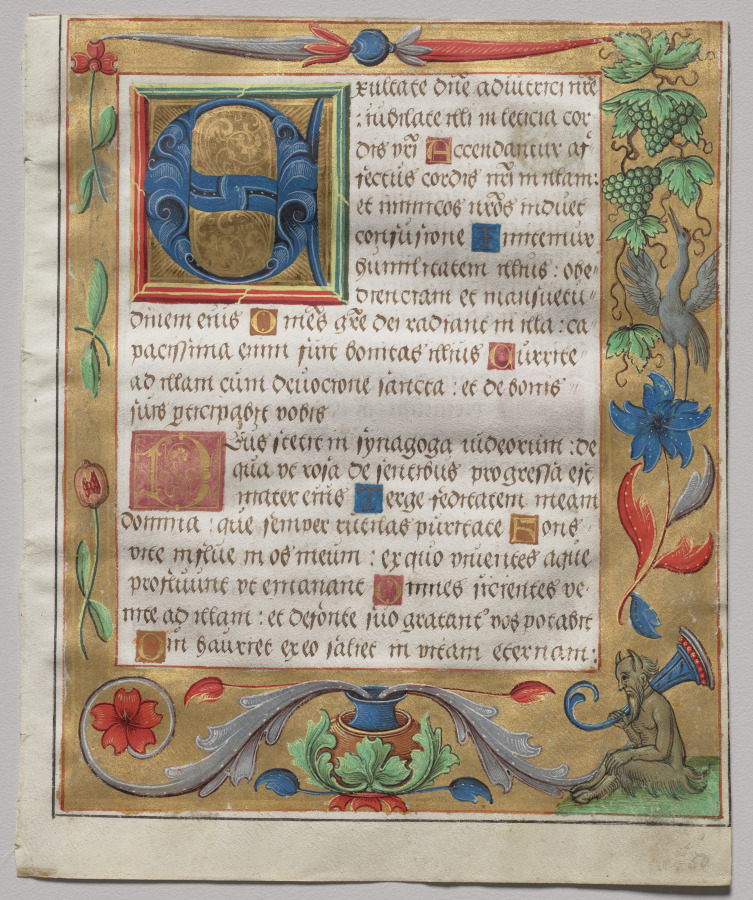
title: Leaf from a Psalter and Prayerbook: Initial E with Ornamental Border Containing a Seated Satyr and a Bird Eating Grapes (recto)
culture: North Germany, Hildesheim (?), 16th century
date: c. 1524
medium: ink, tempera and liquid gold on vellum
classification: Manuscript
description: This leaf and the one nearby were excised from the same prayer book that contained ornamental borders on nearly every page. They represent the intricate decoration found throughout the parent volume, its leaves now dispersed. Virtually every border, recto and verso, or front and back, was decorated with liquid gold and highlighted with a variety of flowers, fruits, vegetables, and animals; here a bird eats grapes while seated below is a satyr, or half goat and half man.